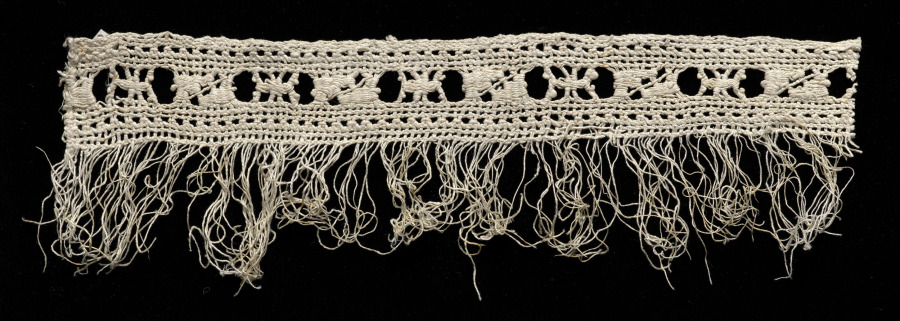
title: Lace fragment with fringe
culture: Italy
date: 1500s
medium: Linen: needle lace (drawnwork) edging and fringe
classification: Lace